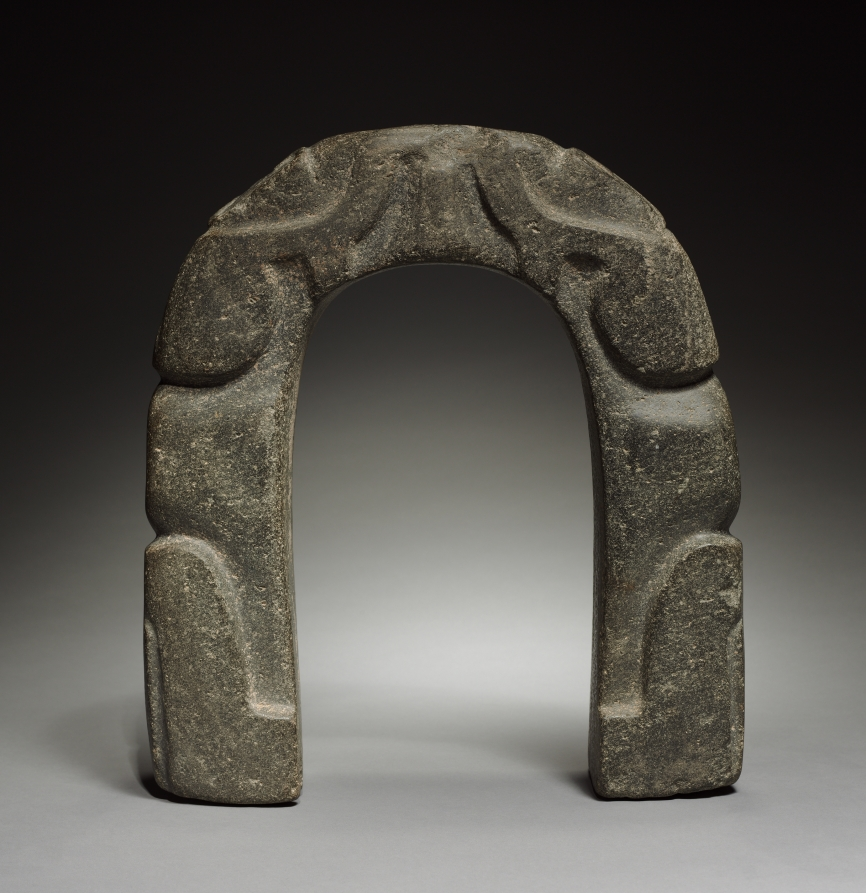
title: Unfinished Yoke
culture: Mexico, Central Veracruz, Classsic Veracruz style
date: 600–900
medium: gray stone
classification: Sculpture